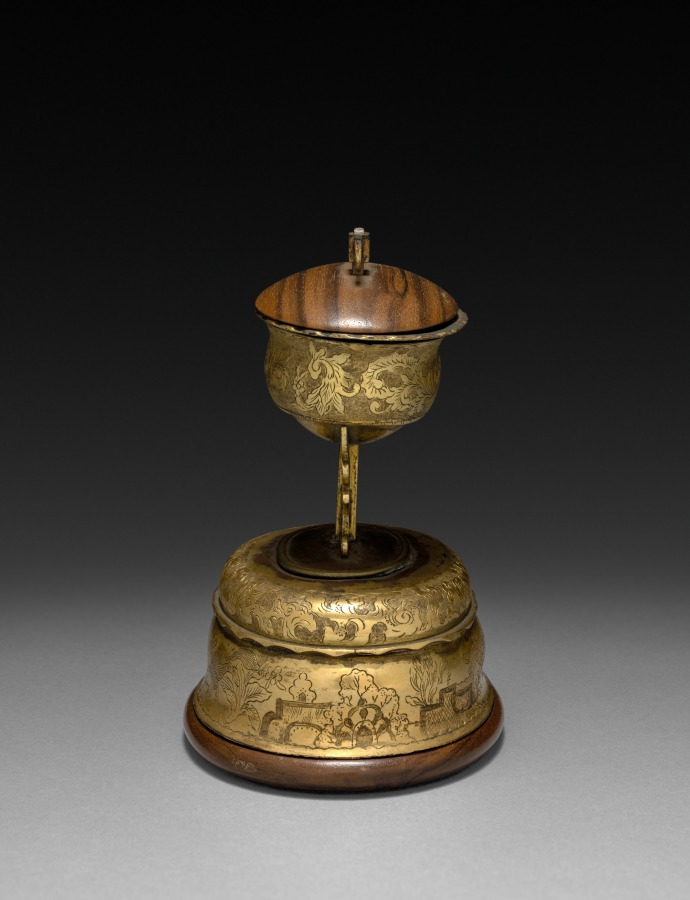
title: Incense Burner (?)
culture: Japan, Kamakura period (1185–1333)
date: 1185–1333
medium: gilt bronze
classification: Metalwork